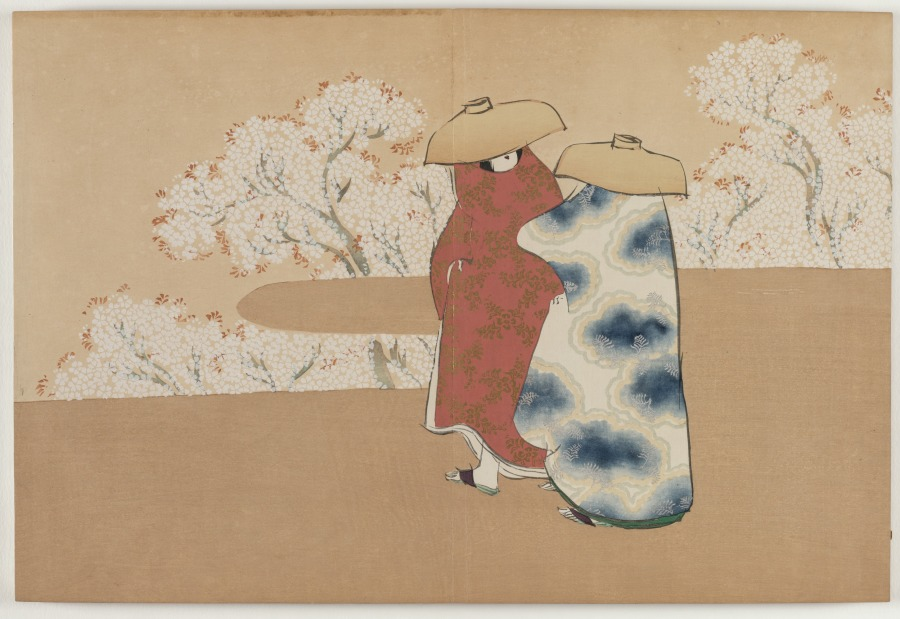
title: Flowers of a Hundred Worlds (Momoyogusa): The Third Month (Yayoi)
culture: Japan, Meiji period (1868–1912)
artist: Kamisaka Sekka (Japanese, 1866–1942)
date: 1909–10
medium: color woodcuts with gold and silver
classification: Bound Volume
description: This print from a set of three woodblock printed albums displays the graphic design prowess of Kamisaka Sekka. The images were first distributed one by one to subscribers to the series but later were reissued in bound form, like this book, for mass consumers. Each print features a vignette taken from nature or Japanese literature. Many of the scenes have a long history in Japan, originating in the 900s or 1000s and having been interpreted by all manner of artists since that time. Sekka’s selections hew closely to precedents from the Rinpa style originated by painter Tawaraya Sōtatsu (c. 1570–c. 1640) and calligrapher Hon’ami Kōetsu (1558–1637).